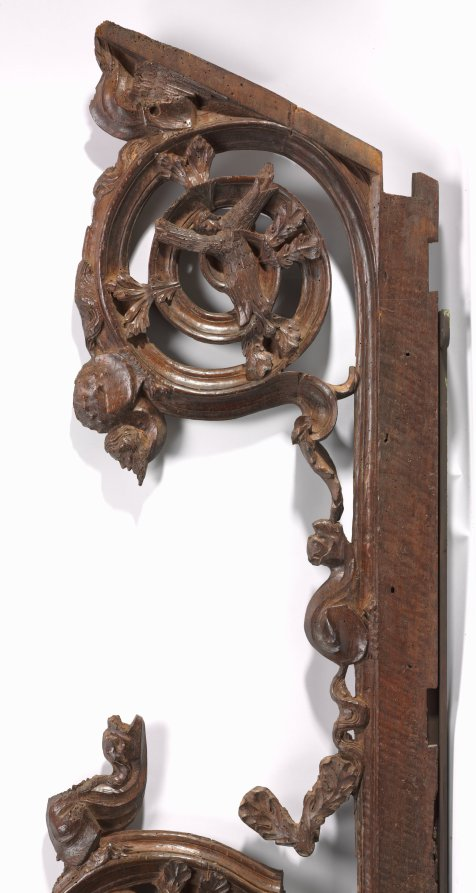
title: Panel from a Choir Stall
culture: Spain, Catalonia, Monastery of Pedralbes, 14th century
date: c. 1330–1340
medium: walnut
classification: Furniture and woodwork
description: The large panel shown here was probably the end panel of a stall that faced another across the choir of a Gothic church. The panel is carved with the figure of St. Francis of Assisi kneeling in prayer and receiving the stigmata. Two standing figures also appear on this panel: a nun at the left (perhaps St. Claire) and a female martyr at the right. Below is St. Michael and the dragon.